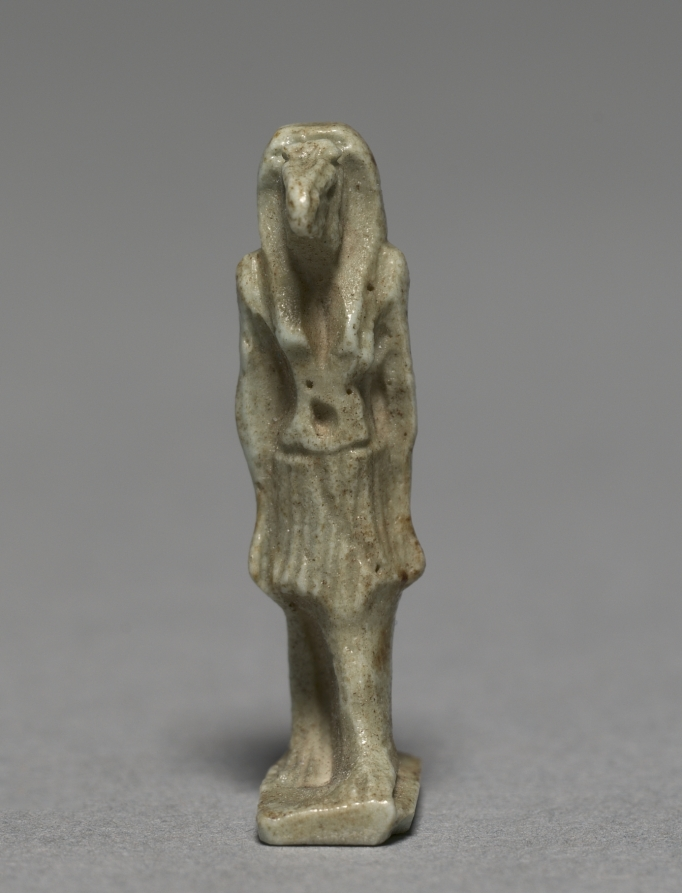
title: Amulet of Thoth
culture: Egypt, Late period (715–332 BCE), Dynasty 30–Greco-Roman period (332 BCE–395 CE), Ptolemaic dynasty (305–30 BCE)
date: 305–30 BCE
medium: gray green faience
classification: Amulets